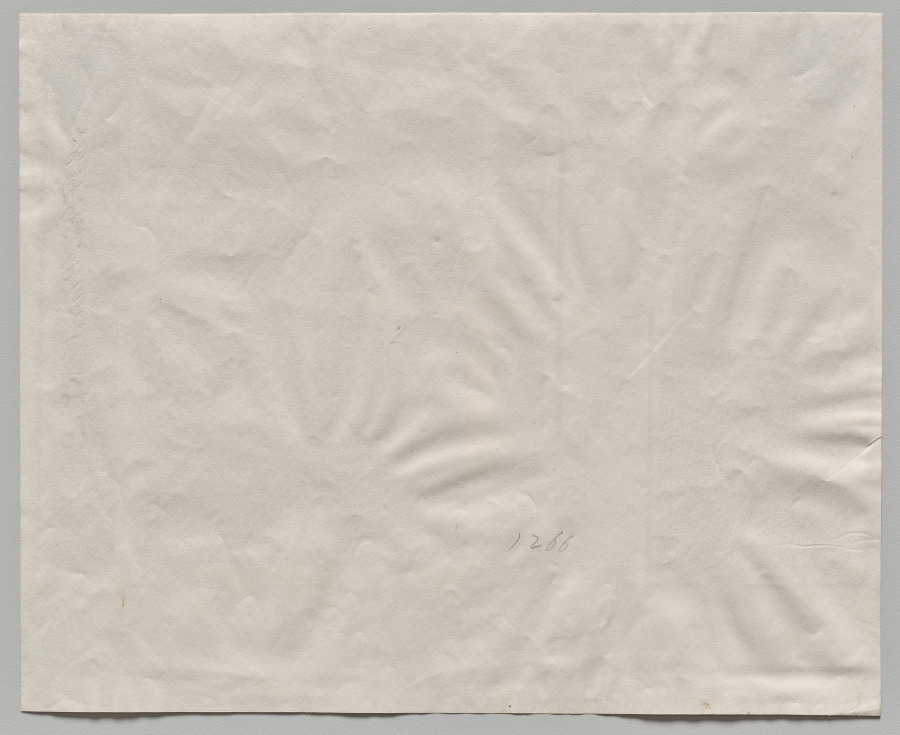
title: Futtypore Sikri—Two of the Marbled Screens in the Tomb of Sheik Selim Chisti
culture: India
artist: Samuel Bourne (British, 1834–1912)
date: 1866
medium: albumen print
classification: Photograph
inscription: Inscription at bottom right: "Bourne 1266"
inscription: Embossed mark at center right edge corresponding to “watermark” on the left edge of verso, RJK Ri… No 72 (?).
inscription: Graphite inscription on verso: "1266"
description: These elaborate screens decorate the mausoleum of the Sufi saint Salim Chisti (1478-1572). The building, considered one of the finest examples of Mughal architecture in India, was built in 1580-1581 by the Emperor Akbar to honor the saint, whose prayers he believed had guaranteed the birth of male heirs to the throne.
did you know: Carved marble screens provided not just decoration but also light and air to interiors, while keeping out sun glare and prying eyes.